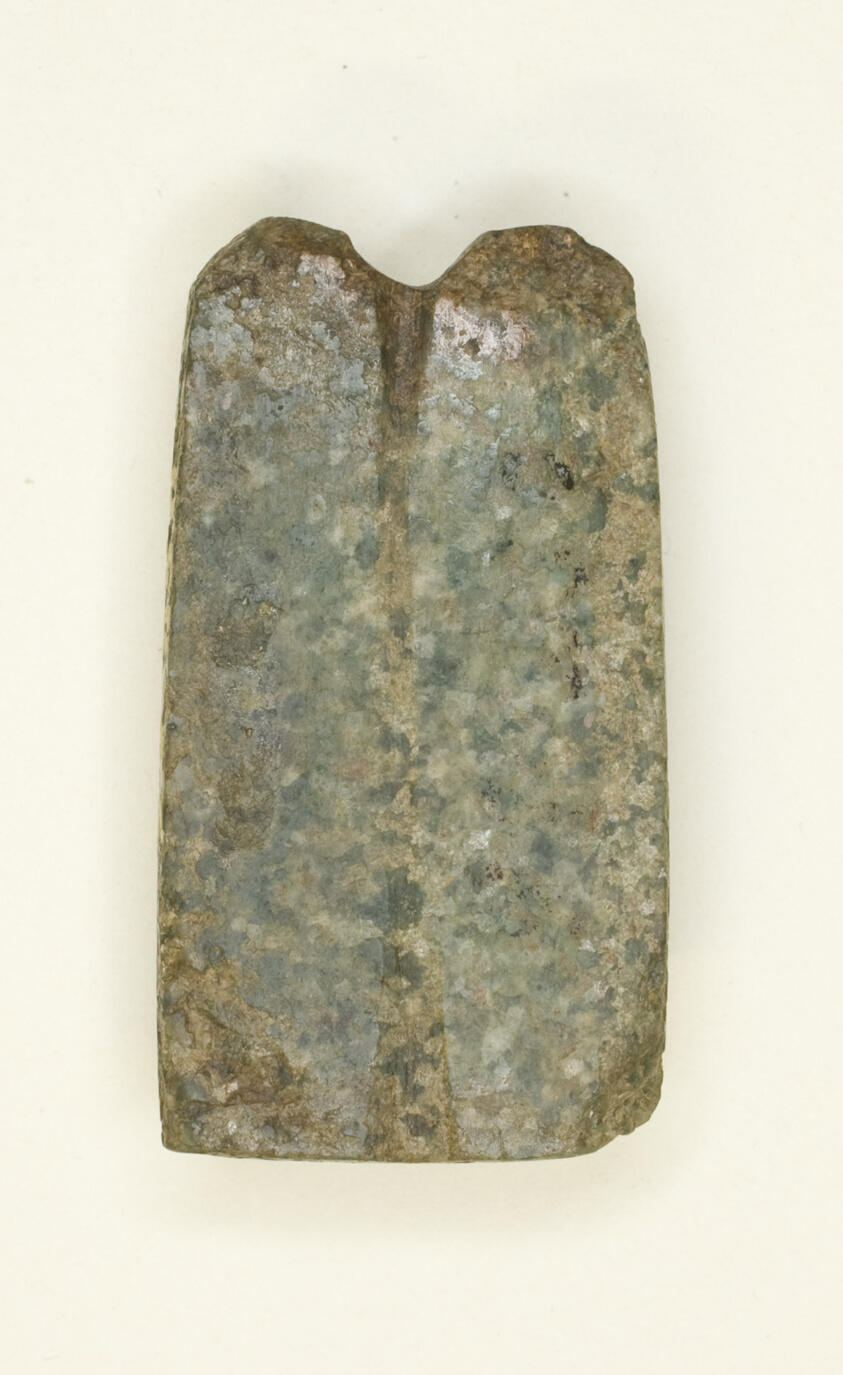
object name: Costume and Accessories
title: Amulet of Double Plumes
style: egyptian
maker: Egyptian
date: Late Period, Dynasty 26–31 (664–332 BCE)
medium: Steatite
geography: Egypt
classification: amulet; jewelry; stone; ancient art; costume